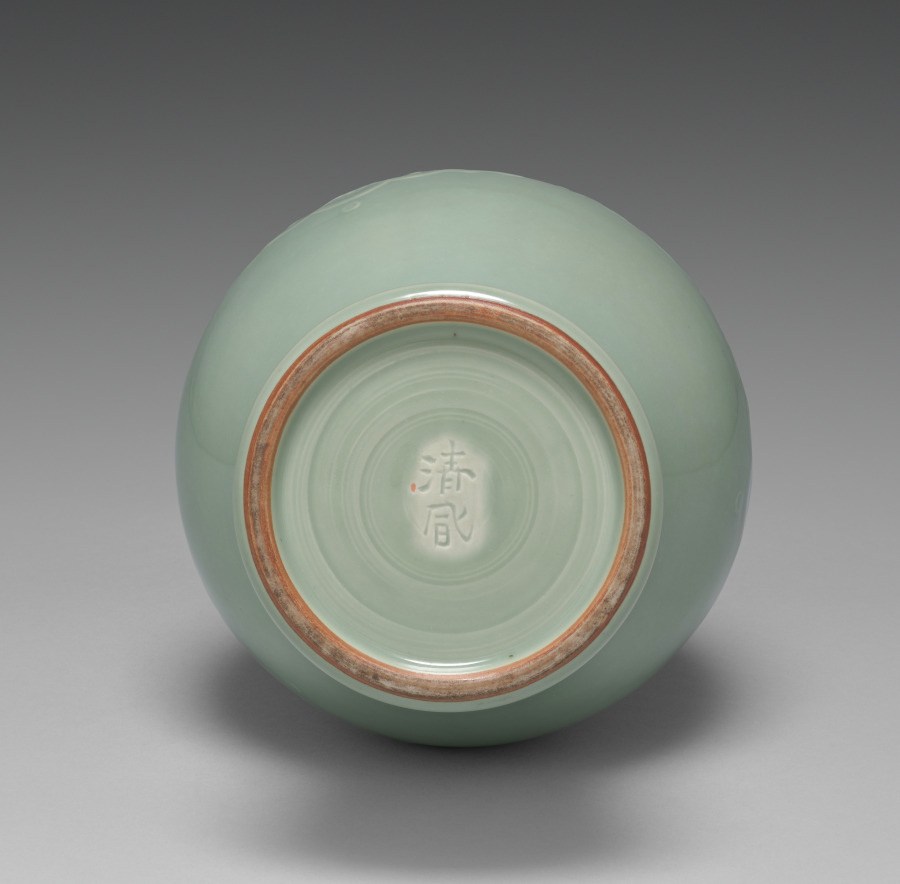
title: Flower Vase with Butterflies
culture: Japan, Meiji period (1868–1912)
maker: Seifū Yohei III (Japanese, 1851–1914)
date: 1907–14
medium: Porcelain with green glaze and carved and molded design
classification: Ceramic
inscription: 清風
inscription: 【印】 帝室技芸員。 【印】 清風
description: This flower vase has two pairs of butterflies forming low-relief roundels, one on each side. The butterflies face each other, one positioned above and the other below, their antennae curling up to a centrally placed floral motif. In the spaces between the pairs of insects, additional raised floral designs are set within vinelike extensions reminiscent of open metalwork banners and canopy adornments in Buddhist temples. The lip and the foot of the vase remain white, and the thinning of the green glaze within the higher-relief portions of the body decoration accentuates the designs. This work, like the sweets bowl CMA 2022.232, has a box lid attribution to Yohei III by Yohei IV. His inscription is dated to the autumn of 1919.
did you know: The box identifies the vase as in the hisokuyō (Chinese mise yao 秘色窯), or “mysterious color ware,” style.